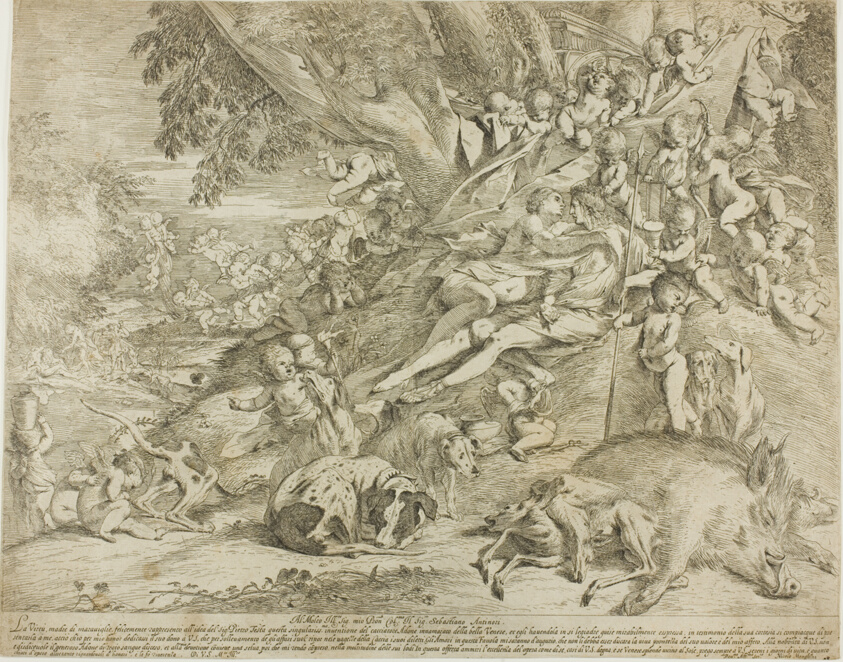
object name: Print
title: Venus and Adonis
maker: Pietro Testa (Italian, 1611/12-1650)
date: 1631–37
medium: Etching on cream laid paper, laid down on cream laid paper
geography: Italy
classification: etching; print; prints and drawing